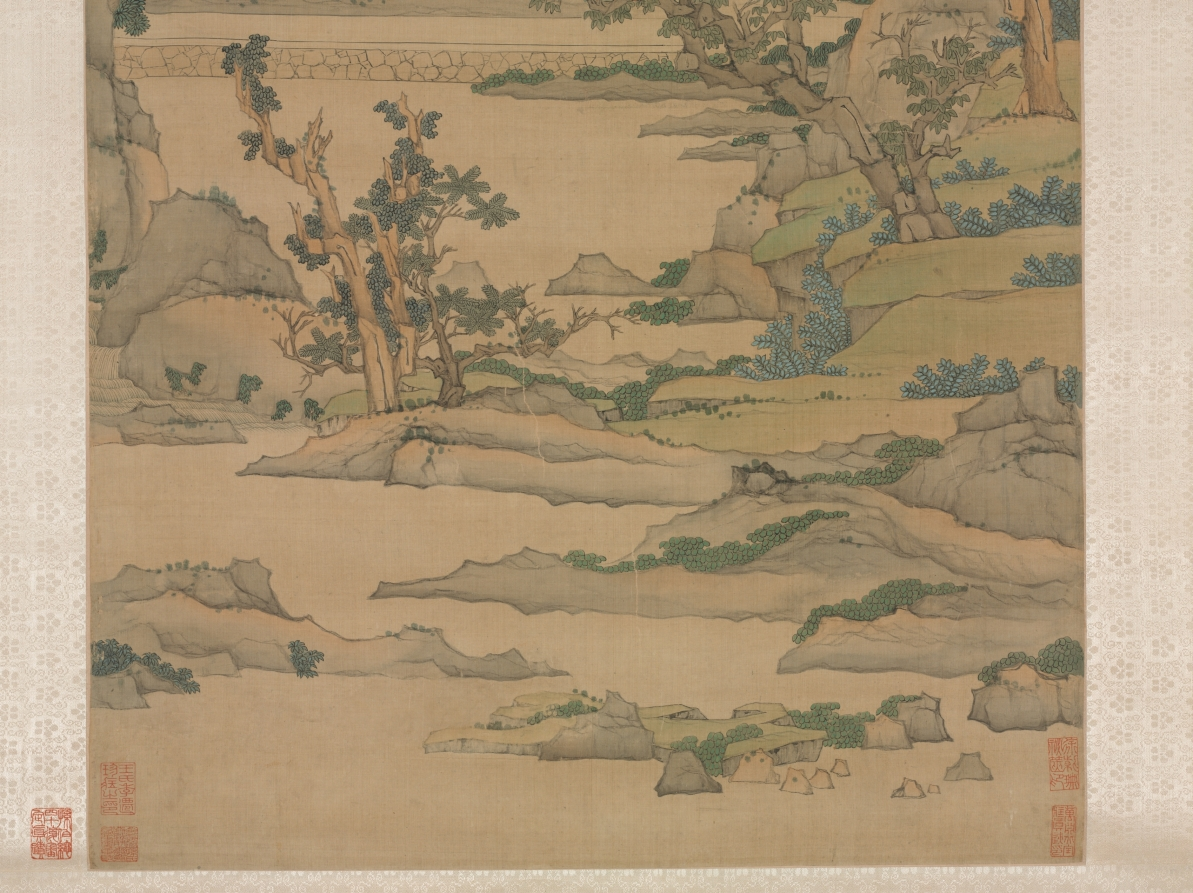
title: Lady Xuanwen Giving Instruction on the Rites of Zhou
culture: China, Ming dynasty (1368–1644)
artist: Chen Hongshou (Chinese, 1598/99–1652)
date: 1638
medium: Hanging scroll; ink and color on silk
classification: Painting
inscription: 宣文君者韋逞母宋氏也。父授以周官音義，曰：吾家世學傳周官。傳業相繼。此又周公所製，經紀〔典〕誥百官品物備於此矣。女可受之。君諷誦不輟。石帝徙山東。君乃推鹿車，背負父所授書到冀州。逞時年少。晝則採樵，夜則教逞。逞遂學成名立。仕符堅為太常。堅常幸其太學，問博士經典。乃憫禮樂遺缺。時博士盧壺對曰：廢學既久，書傳零落。比年綴撰，正經粗集。惟周官、禮經，未有其師。竊見太常韋逞母宋氏世學家，女傳其父業。得周官音義。今年八十。視聽無闕。非此母無可傳授後生。于是就宋氏家立講堂，置生員百二十人。隔絳紗縵而授業焉。拜宋氏爵，號為宣文君。賜侍婢十人。周官學後行于世。 崇禎戊寅八月二日，為綬姑六旬之辰。綬弟自成為姑偦。偕姑季女駱密、外孫楹、楠、楩、橒、楞、棅、孫女惠、漉酒上壽，屬綬圖寫，所以頌祝者。綬思宋母尚五胡之時，經藉屬之婦人；今太平有象，而秉杖名義者，獨綬姑爾。敬寫此圖，且厚望于弟紹焉。猶子洪綬九頓首。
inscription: 5 additional seals: 2 of Xu Weiren 徐渭仁(1788－1855); 2 of Sun Zutong 孫祖同 (1894–1937); 1 of C. C. Wang 王季遷 (1907–2003).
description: This painting by Chen Hongshou depicts the story of Xuanwen Jun, or Lady of Literary Propagation, at a venerable age, instructing young scholars on the Confucian classics. It was painted for Chen’s aunt in celebration of her 60th birthday. Chen’s painting style is archaic in the use of fine outlines and brilliant coloring with mineral pigments. In depicting the figures, he uses the “iron-wire” brush style (fine, even lines) with deliberate control. The faces are elongated and exaggerated. A few ritual bronzes lend the scene an antique flavor.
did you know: Chen Hongshou's long inscription at the top of the painting compares his virtuous aunt with the historical exemplar, Lady Xuanwen.